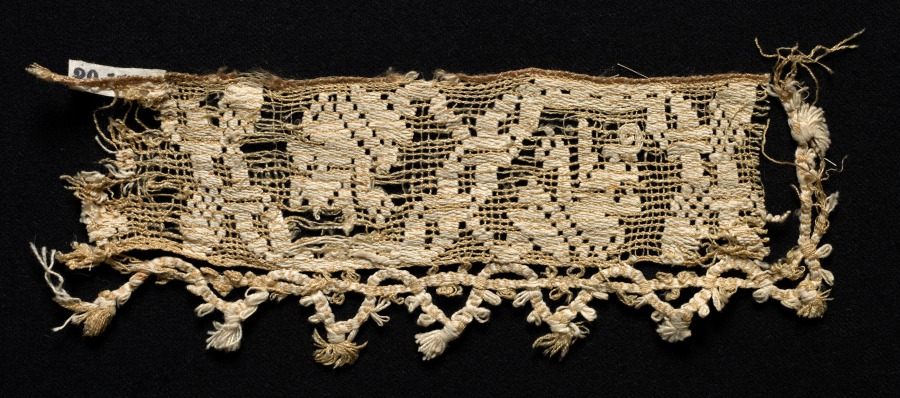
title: Fragment of a Border with Abstract Pattern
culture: Italy, Sicily, 1500s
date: 1500s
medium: Unbleached and bleached linen (est.), or cotton (est.): needle lace, burato (twined ground and darned in one direction); brown silk (est.): bobbin lace edging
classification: Lace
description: The dark yellow ground of the unbleached linen allows for the pattern, worked in bleached linen in the buratto technique, to stand out. Brown silk thread has also been incorporated, adding a shimmering effect to the contrasting colors.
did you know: The frayed quality of the fragment causes the buratto pattern to appear abstracted, but it was likely a flowering vine.